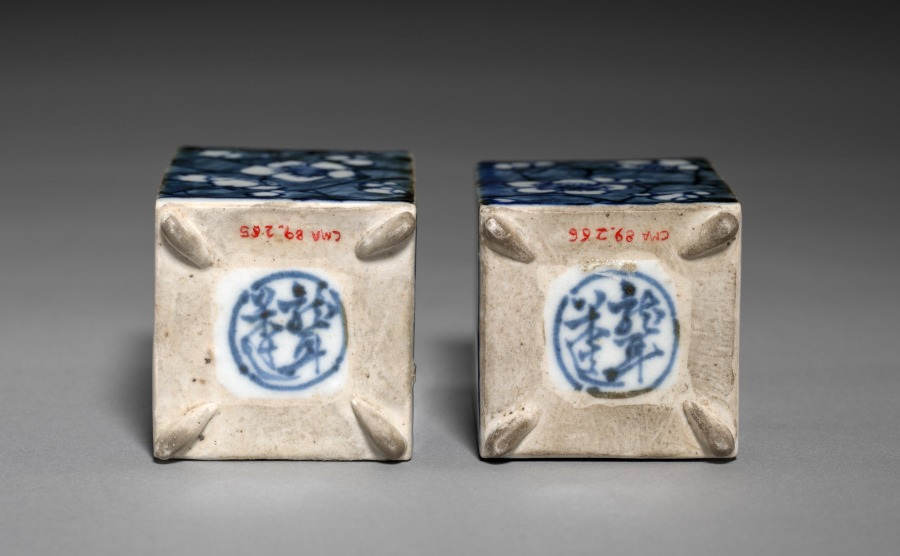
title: Pair of Tea Containers with Plum Blossoms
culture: Japan, Edo period (1615–1868)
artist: Aoki Mokubei (Japanese, 1767–1833)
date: early 1800s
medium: porcelain with underglaze blue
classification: Ceramic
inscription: signed "Ro Mokubei" on base in underglaze blue.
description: Aoki Mokubei, born into a family of restaurateurs, was a potter, calligrapher, painter, and scholar, and is considered one of the three masters of later Edo period Kyoto ceramics. He specialized in porcelains fashioned after Chinese prototypes, and created works for steeped tea (sencha) such as these matching tea caddies decorated in an underglaze blue called sometsuke—literally “with applied dye.” He signed them on their bottoms. They also have intricately patterned silk sleeves to both beautify and protect them. On the exterior of the lid of the outer wooden box that contains them, it is written that Mokubei inscribed and painted an image on the box. On the interior of the lid, the signature and seals of a former owner are written. Mokubei has signed the lid of the inner box, and a charming ink and light color composition of West Lake in Hangzhou in China covers its three sides. On the fourth side is a long inscription by Mokubei describing the scene.